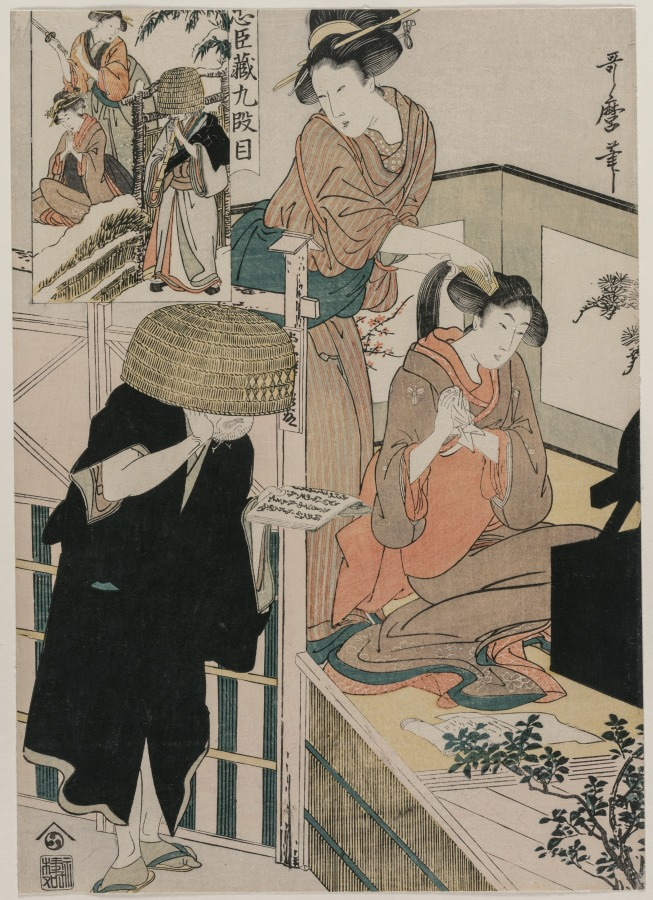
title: Chushingura: Act IX of The Storehouse of Loyalty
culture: Japan, Edo period (1615–1868)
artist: Kitagawa Utamaro (Japanese, c. 1754–1806)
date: late 1790s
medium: color woodblock print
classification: Print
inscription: Aritst's signature: Utamaro hitsu.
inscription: Publisher: Nishimuraya Yohachi (Eiju han, emblem).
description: Stage version: In this dramatic scene depicted in Masayoshi’s stage version (see Chushingura: Perspective Picture for the "Treasure House of Loyalty" [1985.338.9]), Tonase prepares to kill her daughter Tonami with her husband’s sword and then to commit suicide. The dire moment results from the humiliating rejection of her daughter’s marriage contract. Fortunately, her husband, Honzo, dressed as an itinerant Buddhist priest, appears just in time to stop the tragedy. Parody print: In the parody print, Utamaro turned this dramatic event into a scene of domesticity in which the mother brushes her daughter’s hair. An itinerant priest, wearing a deep-brimmed basket hat, reads to them from the gate.